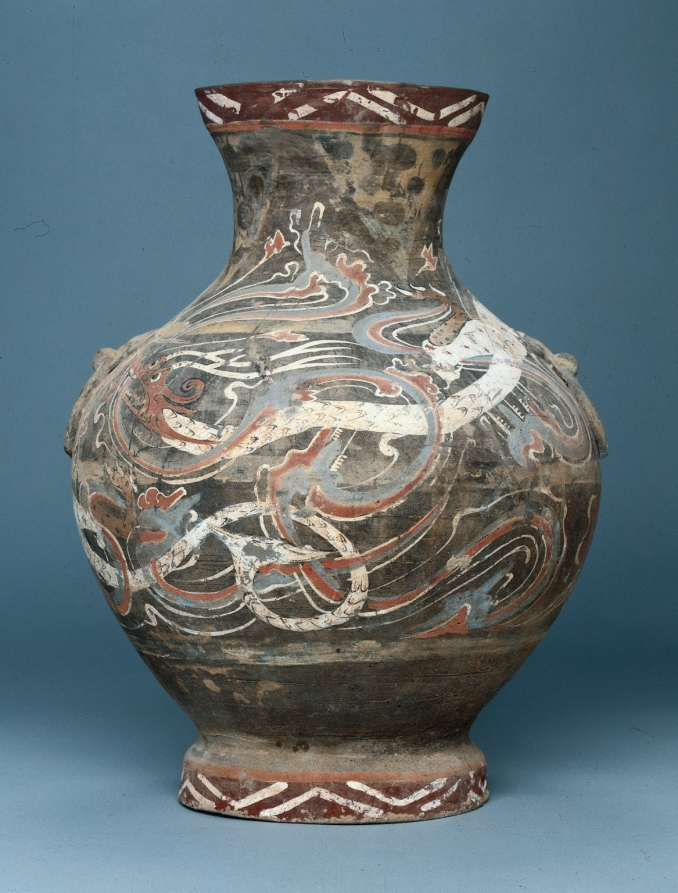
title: Jar (Hu)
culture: China, probably Henan province, Western Han dynasty (206 BCE–8 CE)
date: 202 BCE–9 CE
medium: earthenware with slip and painted decoration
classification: Ceramic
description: Instead of depicting a real landscape, the artist focused on the rhythmic forces of nature and the movement of energy, using the scrolling form as a symbol common to all changes in nature: cloud vapors, waves, and mountains alike. Here a dragon hovers among sweeping scrolls.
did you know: This earthenware wine jar's shape mimics costly bronzes, but the handles have rings that are fixed to the surface of the pot, rendering them useless.